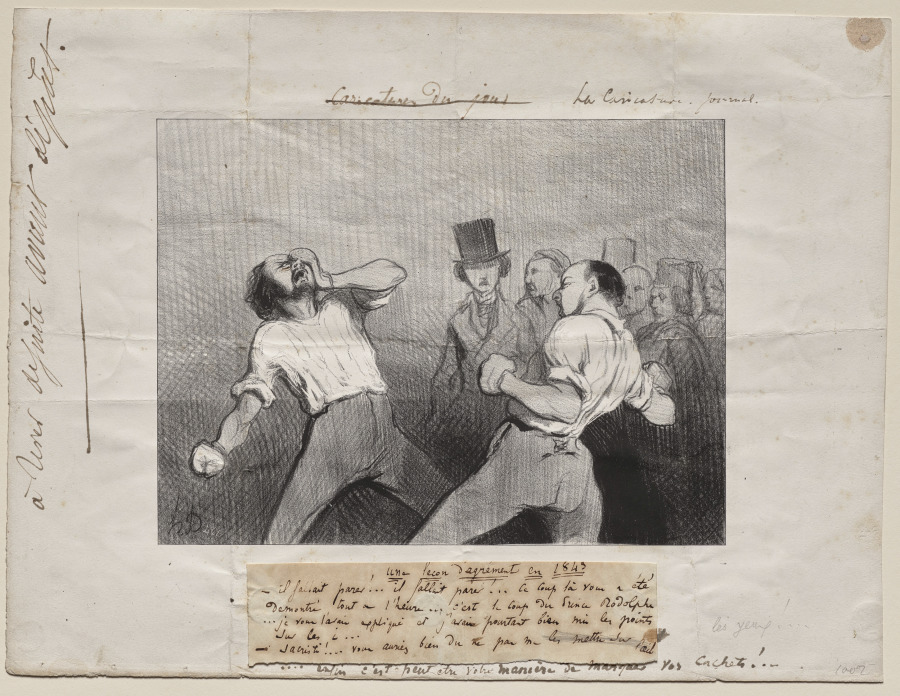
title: Lesson in Understanding in 1843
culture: France, 19th century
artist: Honoré Daumier (French, 1808–1879)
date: 1843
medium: lithograph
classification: Print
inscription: Left margin, pen and ink: "à tirer de suite avant depart." ; Upper margin, pen an ink: "Caricatures du jour. La Caricature. Journal." ; Below the image, pen and ink: "Une lecon d'agrément en 1843 / Il fallait parer!.. il fallait parer!.. ce coup-là vous a éte / démontré tout à l'heure... c'est le coup du prince Rodolphe / ... je vous l'avais expliqué et j'avais pourtant bien mis les points / sur les i... / -Sacrist!.... vous auriez bien dû ne pas me le mettre sur l'oeil [in pencil]: les yeux!... / ....enfin cést peut-être votre manière de marquer vos cachet!...." Verso, in pen and ink: [addressed to] "M. Biais"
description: This print was published first in La Caricature (March 19, 1843) as plate 92 from the series Caricatures of the Day and later in Le Charivari (February 29, 1844) as part of the series News of the Day. The year in the title changed with the publication dates.